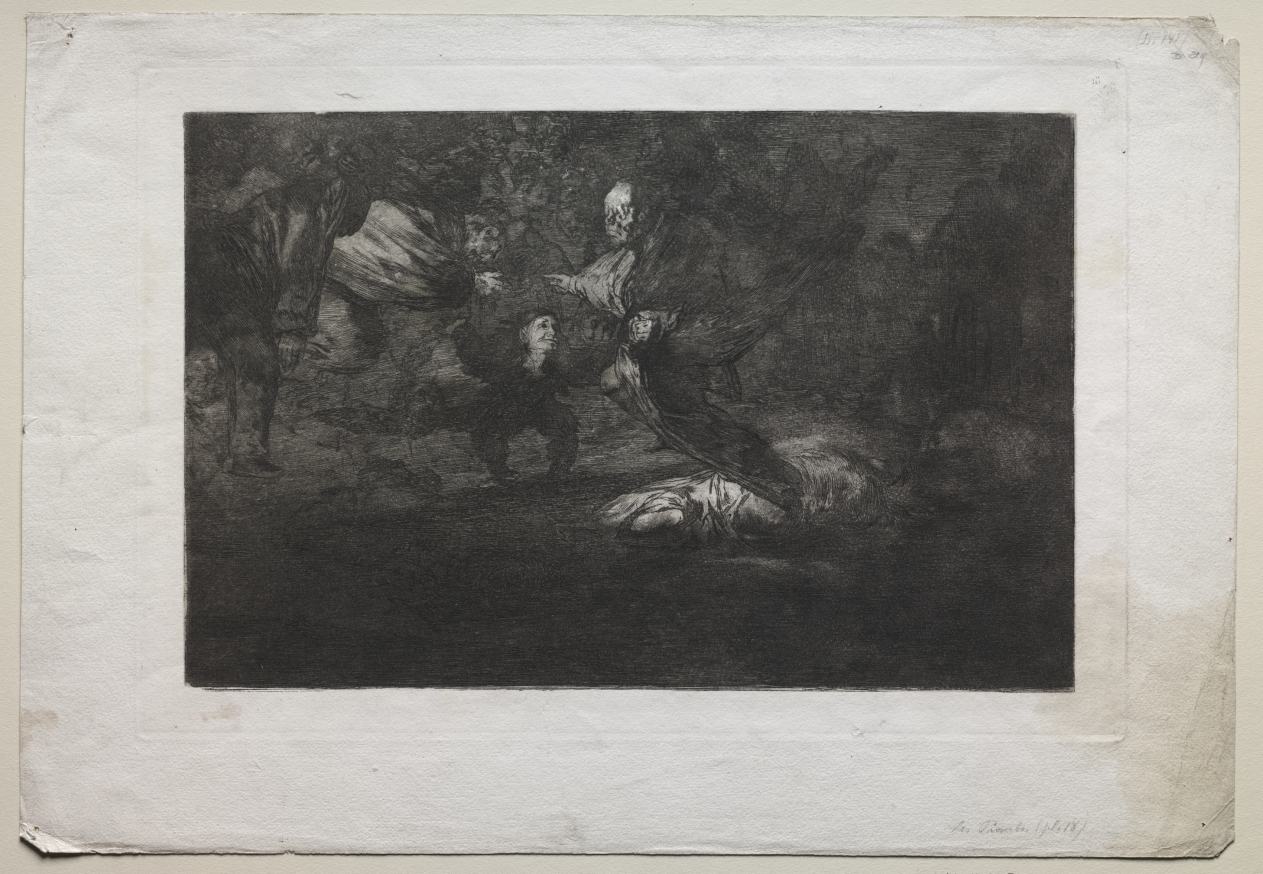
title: God Creates Them and They Join Up Together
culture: Spain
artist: Francisco de Goya (Spanish, 1746–1828)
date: 1815–24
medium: etching and aquatint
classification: Print